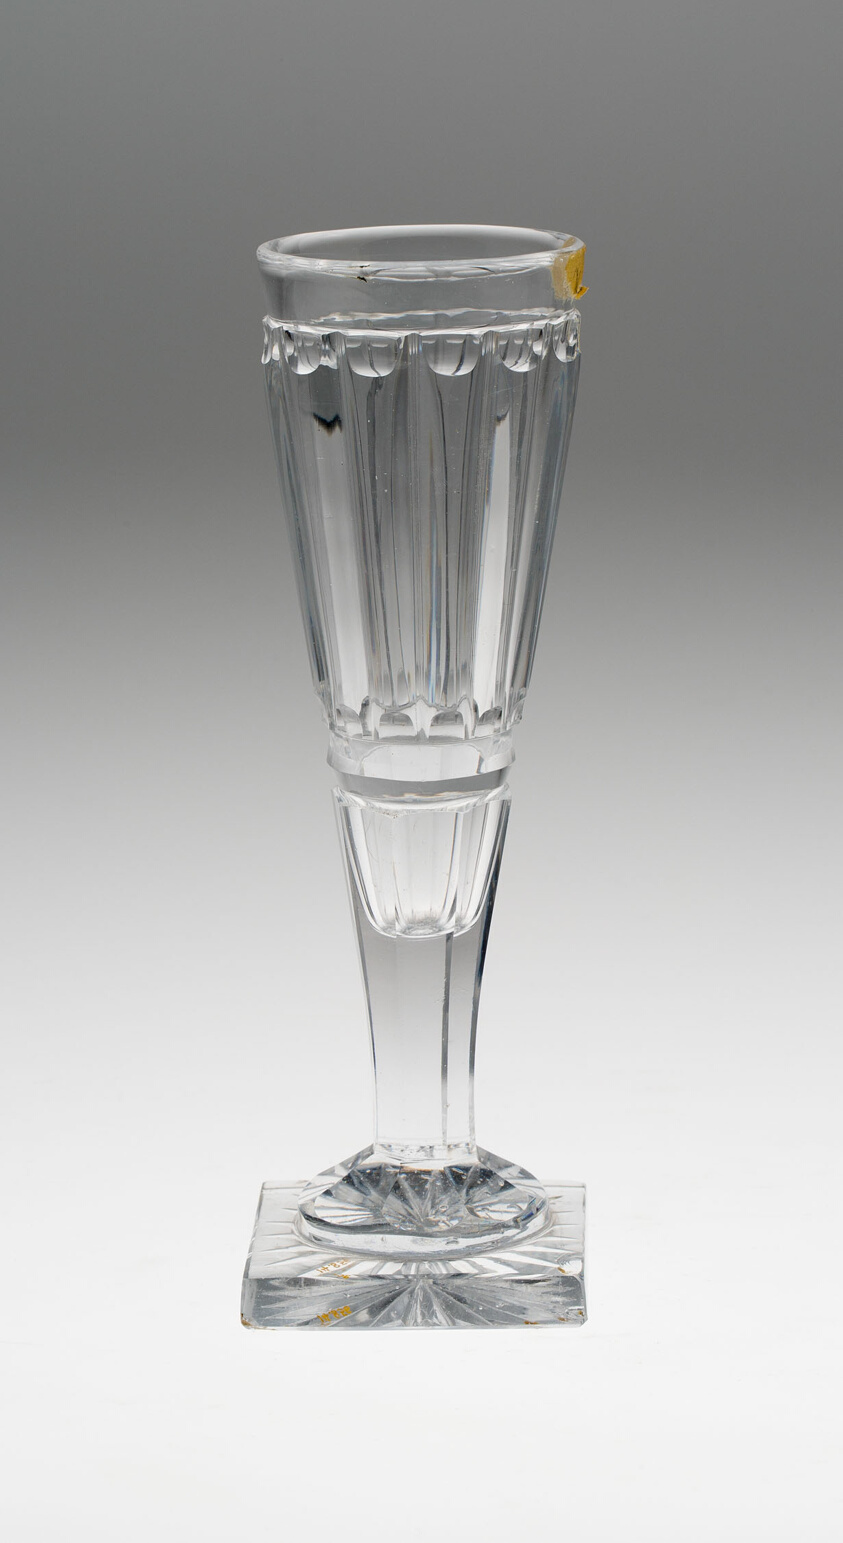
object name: Glass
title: Champagne Glass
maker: England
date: Early 19th century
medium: Glass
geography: England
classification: drinking vessel; glass; european decorative arts